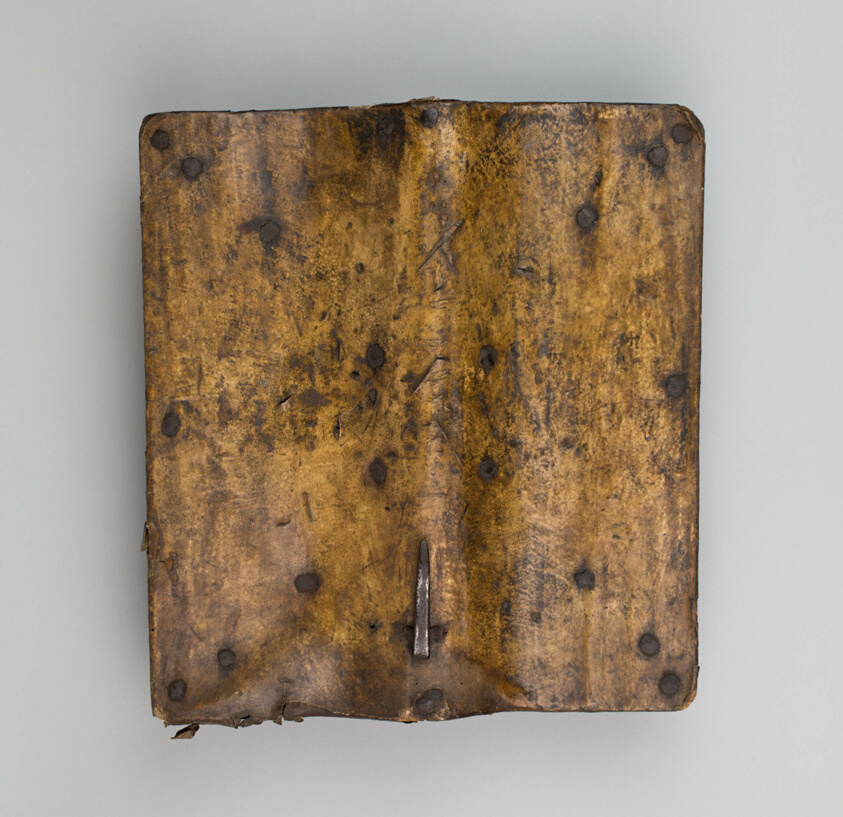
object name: Armor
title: Buckler (Targa)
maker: Italian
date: 1550/75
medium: Wood, parchment, and iron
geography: Italy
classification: shield; armor; arms and armor